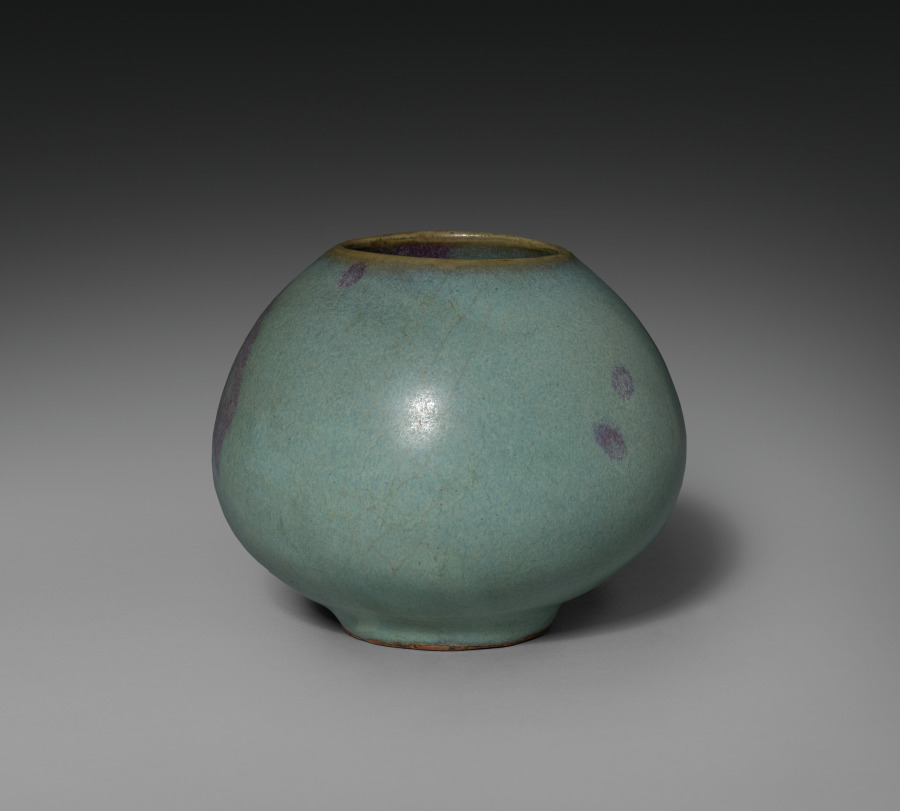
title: Jar with Cover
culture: China, Henan province, Yuxian, Northern Song dynasty (960-1127) or Jin dynasty (1115-1234)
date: 1100s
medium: porcelaneous stoneware with blue glaze and splashes of purple, Jun ware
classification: Ceramic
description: The beauty of Jun ware lies in its spectacular glaze effects, which provide immediate visual appeal. The glaze that is thickly applied onto the heavily potted body also lends the vessel a sense of volume. As shown here, its glaze colors range from soft milky-blue to rose-purple. The purple suffusions are created by splashing or brushing copper-rich pigments onto the glaze before firing. The merging of purple splashes with opalescent blue glaze displays rich tonal variations, resembling purplish glows at sunset.